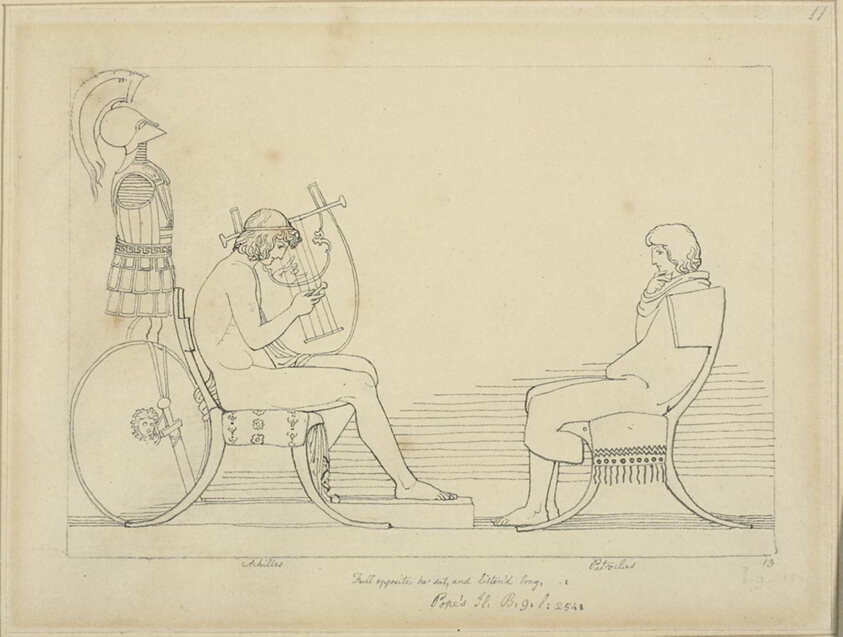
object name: Drawing and Watercolor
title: Achilles and Patroclus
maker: John Flaxman, II; English, 1755-1826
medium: Pen and black ink, over traces of graphite, on cream wove paper, laid down on cream wove paper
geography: England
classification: pen and ink drawings; drawings (visual works); prints and drawing